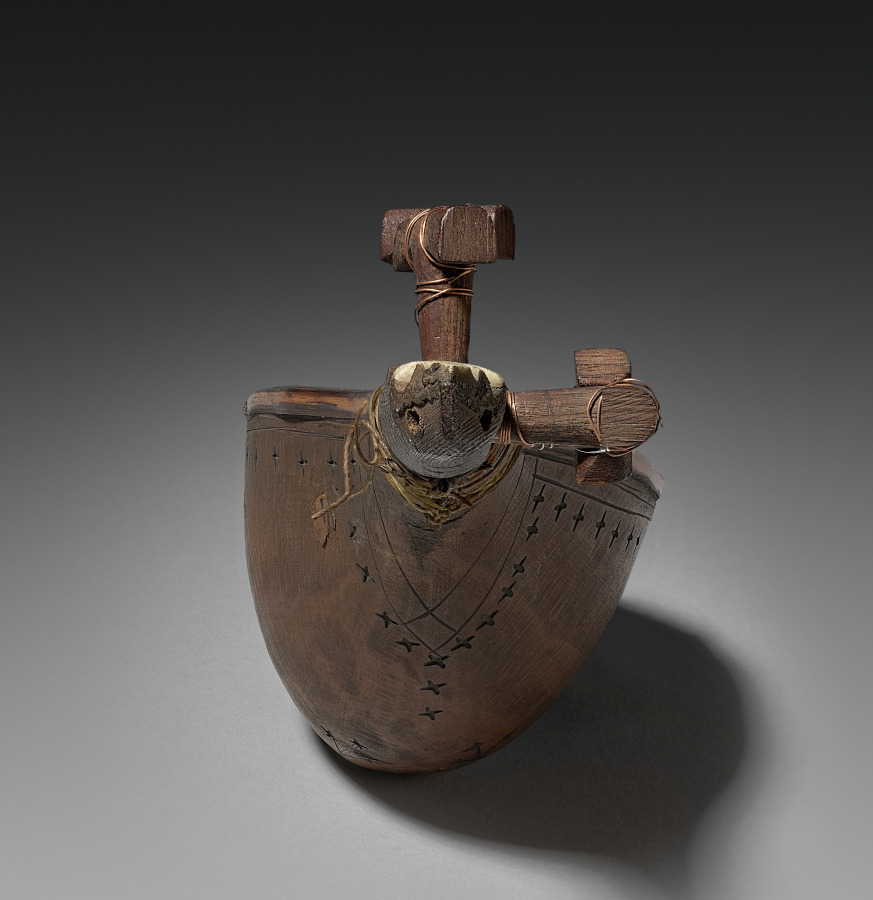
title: Tanbūr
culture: Syria or Turkey, Ottoman period (1299–1922)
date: late 1800s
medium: Wood, bone, mother-of-pearl, and wire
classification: Musical Instrument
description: This long-necked lute collected in Ottoman Syria possesses traits that are Syrian, Turkish, and Iranian and provides an example of the musical interaction between cultures. It is an ancient instrument and resembles lutes used in Pharaonic Egypt and Mesopotamia. In its many forms, the tanbūr was a common instrument throughout the Islamic world. It is often used as a solo instrument in both sacred and secular contexts. Burn marks decorate the pear-shaped body along with inlaid dots of mother-of-pearl, which may also have helped with navigation of the fret board by the player.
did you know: The two pairs of wire strings would be played with a quill plectrum.